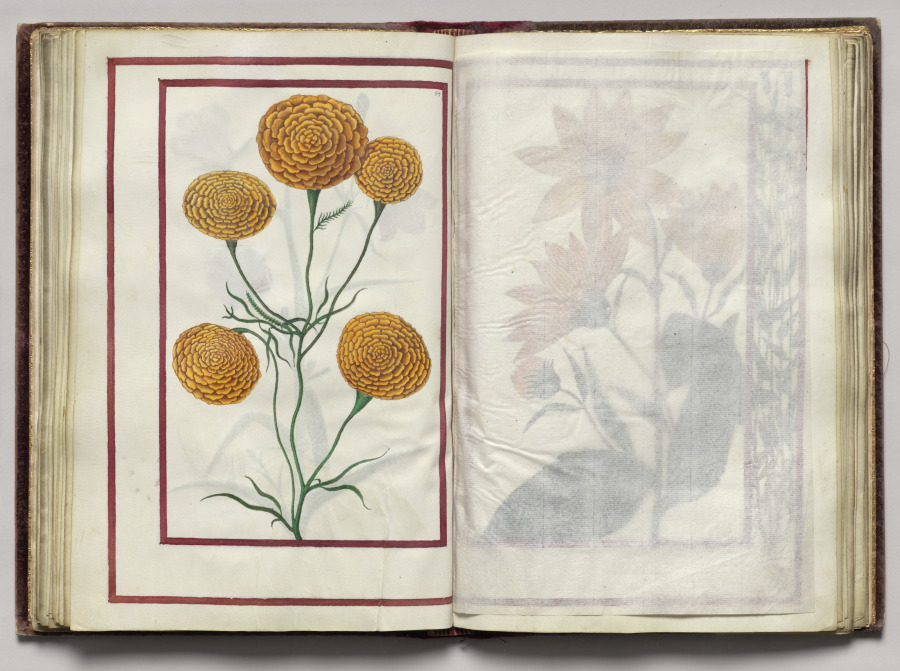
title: Florilegium (A Book of Flower Studies)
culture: France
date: 1608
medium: bound manuscript of 48 leaves, 77 drawings; watercolor, ink, silver, and gold over occasional traces of pencil, on vellum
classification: Bound Volume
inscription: Dated: Poitiers 1608 (on frontispiece) Signed: On frontispiece in black ink, lower right: Van Kuyk Notation on drawing: Frontispiece: in pencil, lower margin: * élève de Van Kessel, peintre flammand (* in pencil also appears in front of Van Kuyk's name).